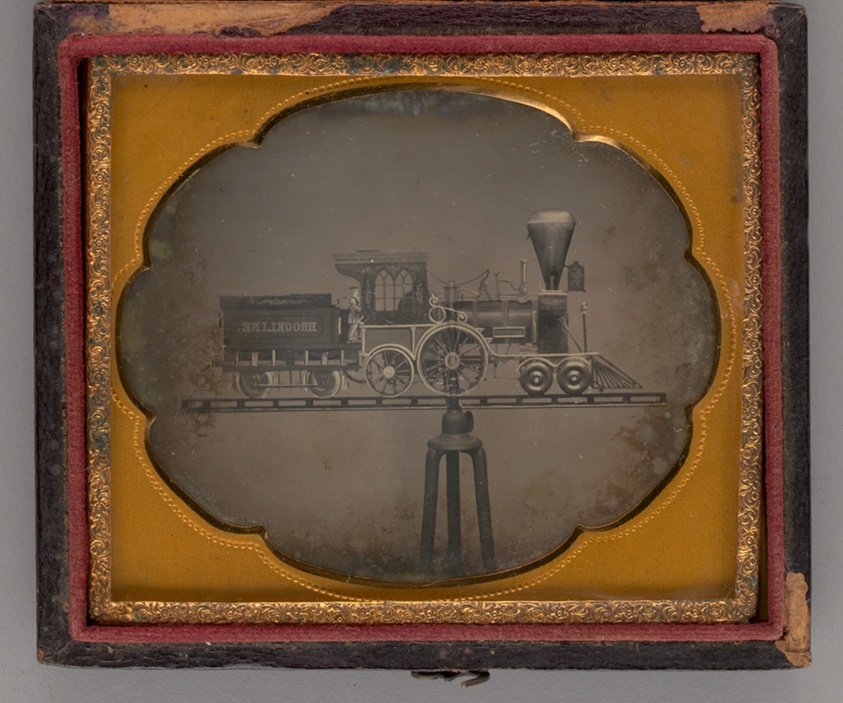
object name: Photograph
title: Untitled (Model of Brookline Steam Engine)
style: 19th century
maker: Unknown maker; American, 19th century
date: 1858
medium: Daguerreotype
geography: United States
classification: portrait; daguerreotype; portrait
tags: lundberg collection, model, trains